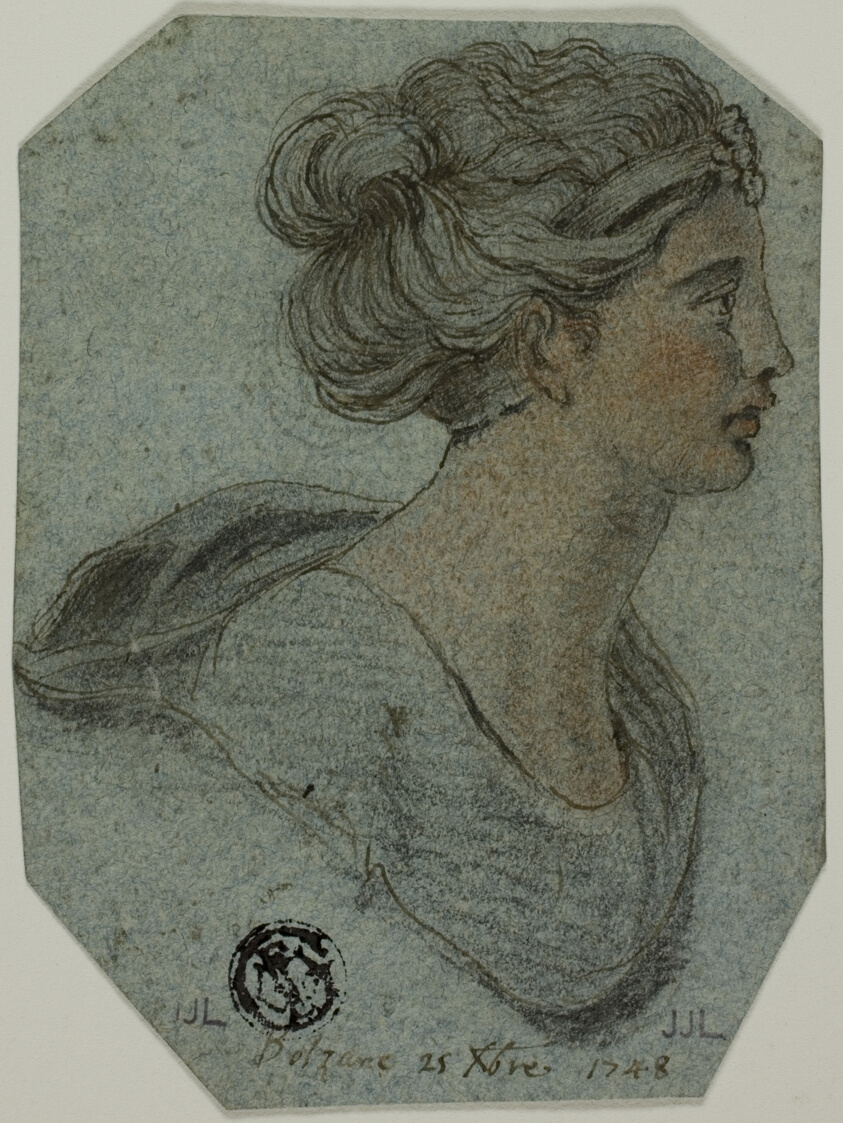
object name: Drawing and Watercolor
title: Bust of Girl in Profile to Right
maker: Unknown Artist; Italian, active 1748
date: 1748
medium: Pen and brown ink, with red chalk wash, black chalk and touches of black crayon, on blue laid paper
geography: France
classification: pen and ink drawings; drawings (visual works); prints and drawing